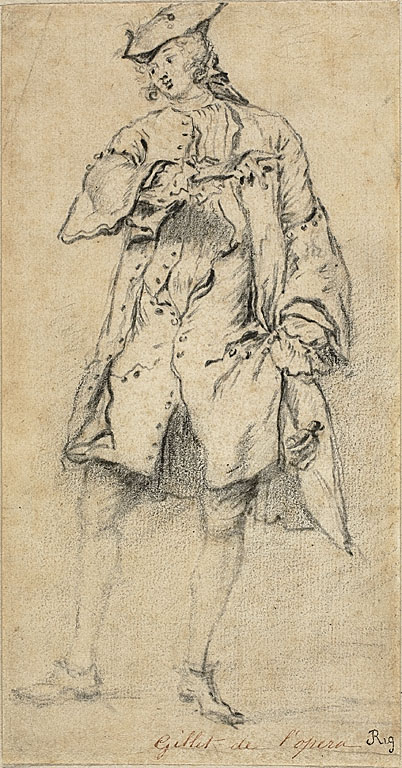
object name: Drawing and Watercolor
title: Young Man Standing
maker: Nicolas Lancret (French, 1690-1743)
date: 18th century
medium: Black chalk, on tan laid paper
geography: France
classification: chalk; drawings (visual works); prints and drawing